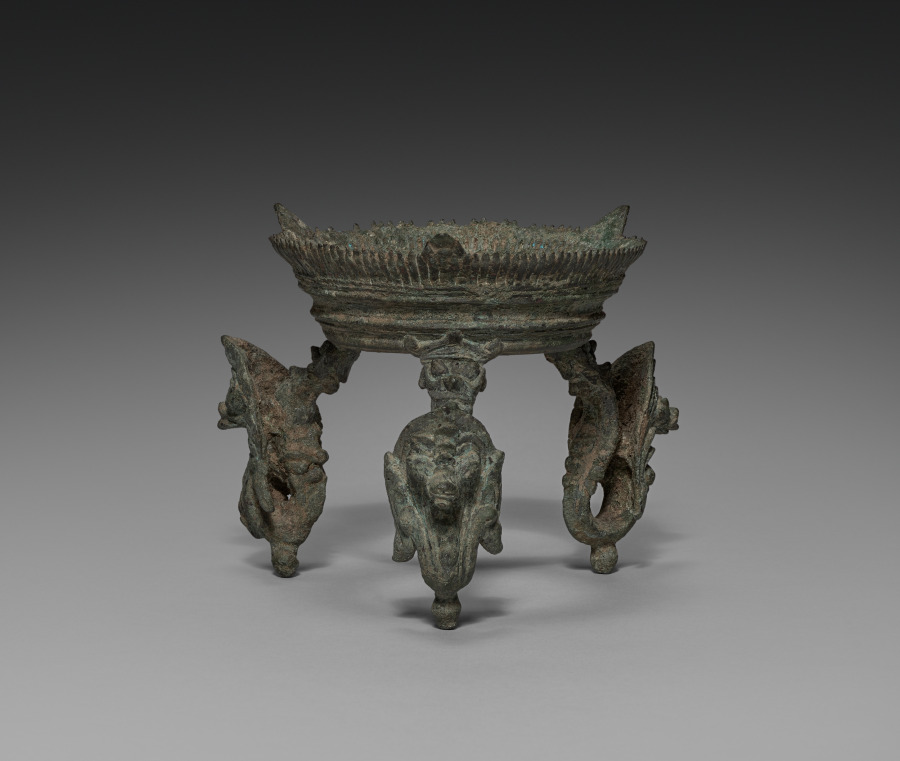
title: Tripod stand with nagas for a ritual conch shell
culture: Cambodia, Khmer, Angkor Period, 12th-13th Century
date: 1100s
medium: shell and bronze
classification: Sculpture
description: A royal temple like Banteay Chhmar was built for performing rituals and to honor images of gods, Buddhas, and other sacred or enlightened beings for the sake of the kingdom’s protection and ongoing prosperity. Conch shells were blown at the start of rituals to make the sound corresponding to the syllable om. The dancing figure of Hevajra, a Buddhist being of enlightenment with eight heads, sixteen arms, and four legs, has been worked into the bronze embellishment of the shell. Hevajra was elevated to a prominent position in Khmer Buddhism of the Angkorian period as the standard figure denoting the practice of rituals prescribed in a text called the Hevajra-tantra. The tripod stand with three serpents is probably not original to the shell.